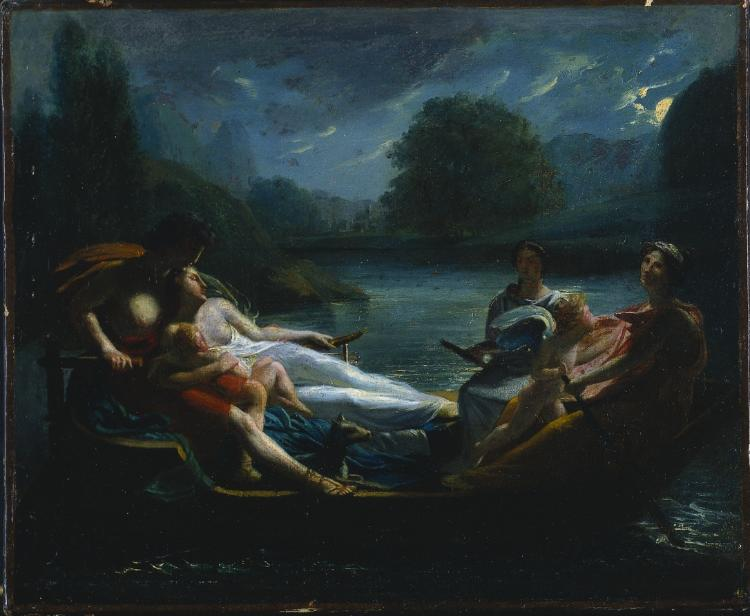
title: The Dream of Happiness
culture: France, 19th century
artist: imitator of Pierre-Paul Prud'hon (French, 1758–1823)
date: after 1819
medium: oil on fabric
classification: Painting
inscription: Signed lower right: P. Prud'hon